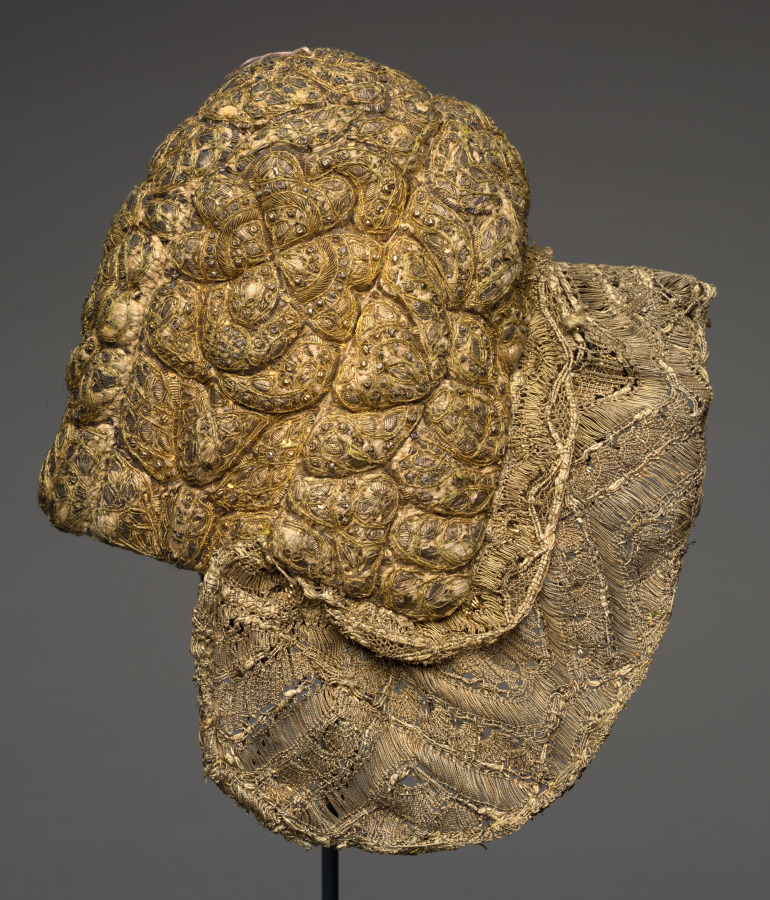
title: Embroidered Peasant Headdress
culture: Germany, Nüremberg, 18th century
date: 1700s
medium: embroidery, gold thread; edged with gold lace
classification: Garment